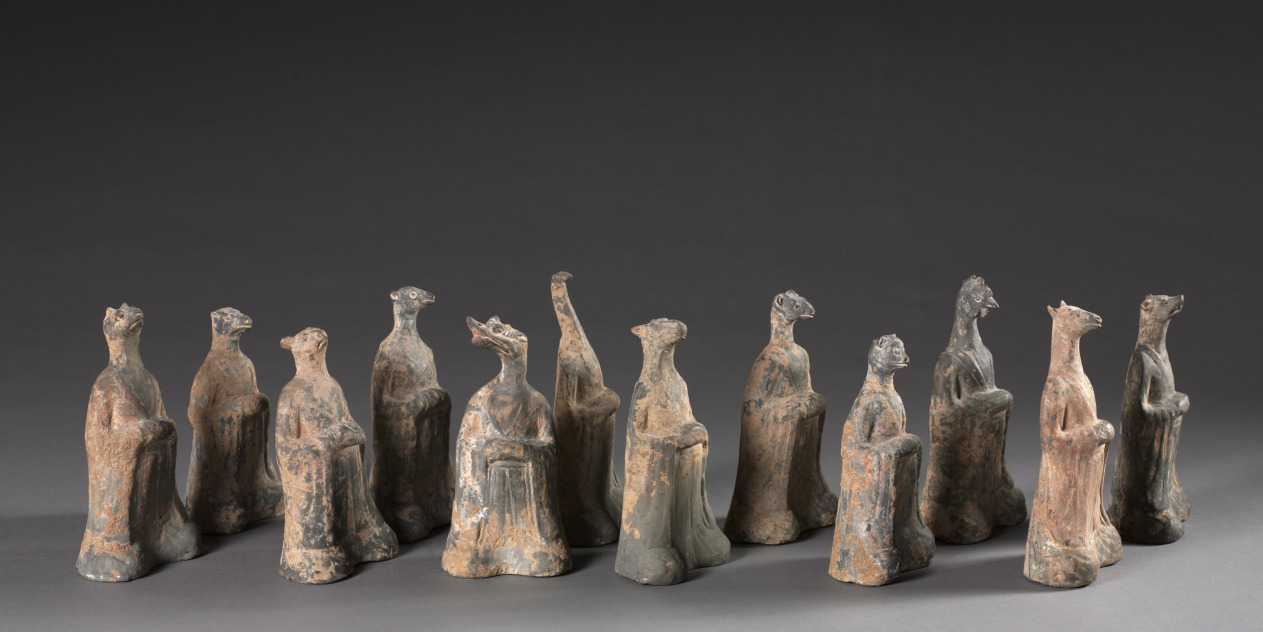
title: Mortuary Figures of the Zodiac Signs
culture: China, Northern Wei dynasty (386–534 CE)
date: 500s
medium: gray earthenware with traces of slip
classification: Sculpture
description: The twelve-animal zodiac series—rat, ox, tiger, rabbit, dragon, snake, horse, goat, monkey, rooster, dog, and boar—signifies a traditional Chinese concept of time structured in a cyclical order. The twelve animals are also linked to the art of fortune-telling that underlies human existence in connection with the changes of the universe. The use of the twelve zodiac animals as tomb furniture suggests they provided a cosmological structure for the afterlife.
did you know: These earthenware mortuary figures appear to have been made in molds.